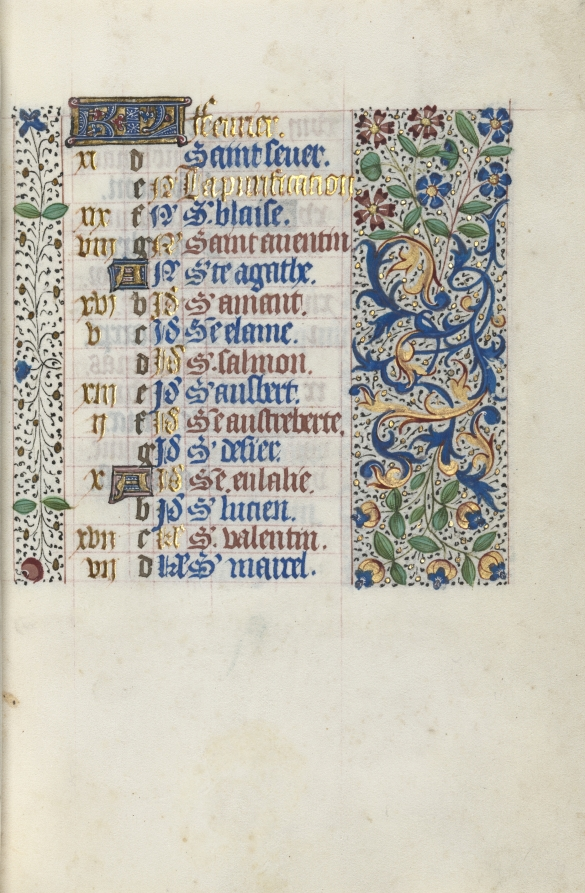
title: Book of Hours (Use of Rouen): fol. 2r, Calendar Page for February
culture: France, Rouen, 15th century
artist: Master of the Geneva Latini (French, active Rouen, 1460–80)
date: c. 1470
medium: ink, tempera, and gold on vellum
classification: Bound Volume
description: In the late 1400s and early 1500s Rouen was an established and important center of book production. The city’s cathedral had a wealthy chapter that spent large sums of money to commission books and to maintain its extensive library. The stationers and booksellers would have likely been concentrated in or near the cathedral precinct. This artist, named after a manuscript now in Geneva, was Rouen’s principal illuminator during the second half of the 1400s.